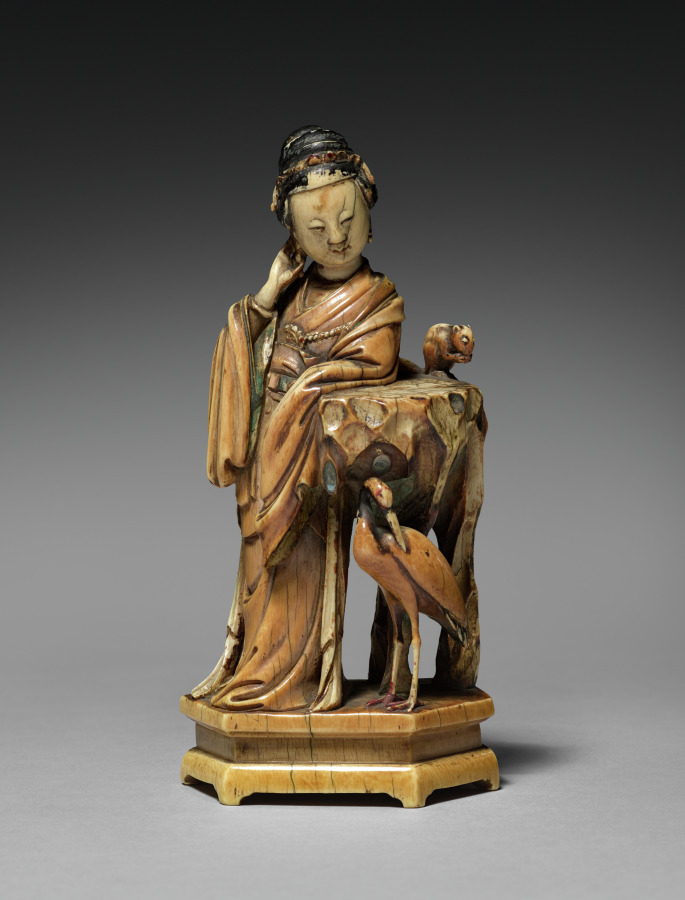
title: Female Figure with Crane and Squirrel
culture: China, Qing dynasty (1644-1911), Kangxi reign (1662-1722)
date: 1662–1722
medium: ivory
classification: Ivory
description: In the Qing dynasty (1644–1911), luxury items became more affordable to larger parts of the society, including women, merchants, and literati in non-official positions. Imperial patronage and a growing urban population encouraged consumption of luxury goods and local craftmanship. This ivory form of a woman with a crane illustrates the superb skills and the creative mind of the talented artisan who sought clients on a competitive market.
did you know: The ivory has aged to a rich amber, while traces of its original red and green paint remain on the woman’s cuffs and collar.